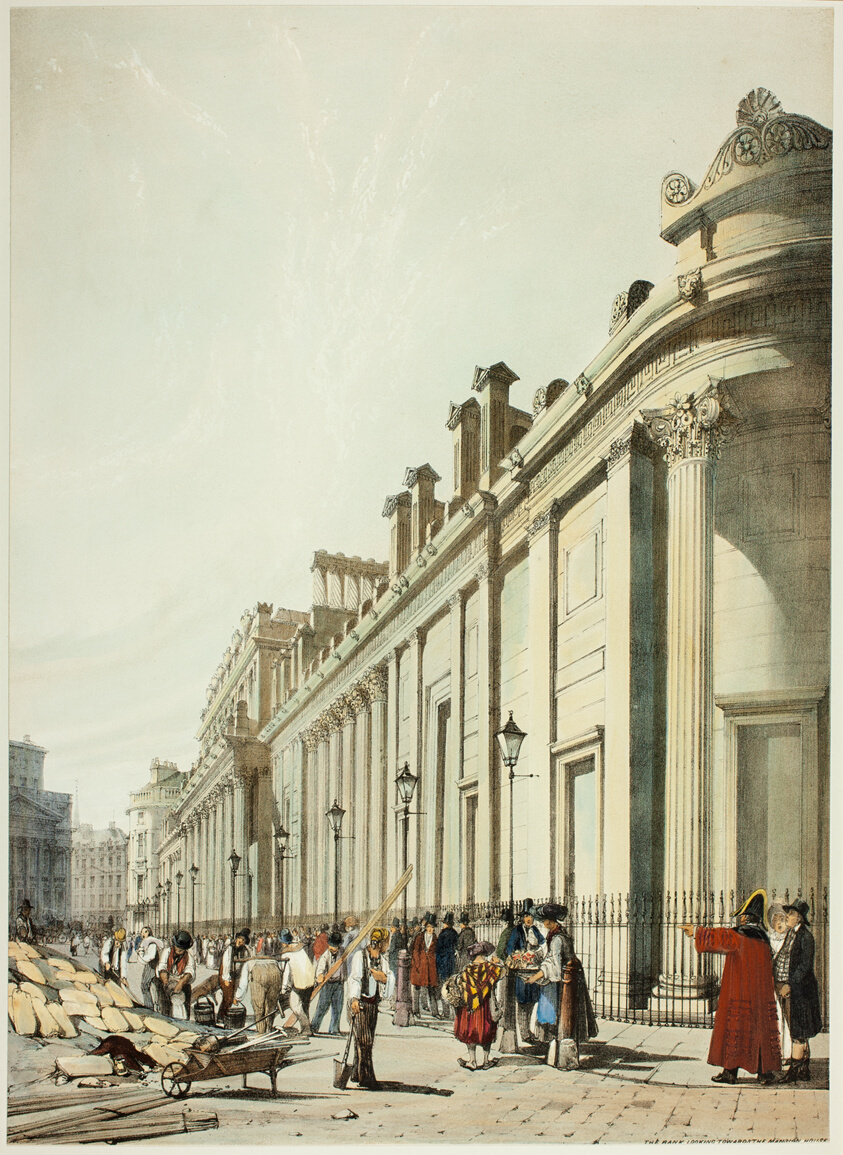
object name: Print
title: The Bank Looking Towards the Mansion House, from Original Views of London as It Is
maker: Thomas Shotter Boys (English, 1803-1874); designed by Charles Ollier (English, 1788-1859)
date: 1842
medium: Hand-colored lithograph on paper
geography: England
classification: lithograph; print; prints and drawing